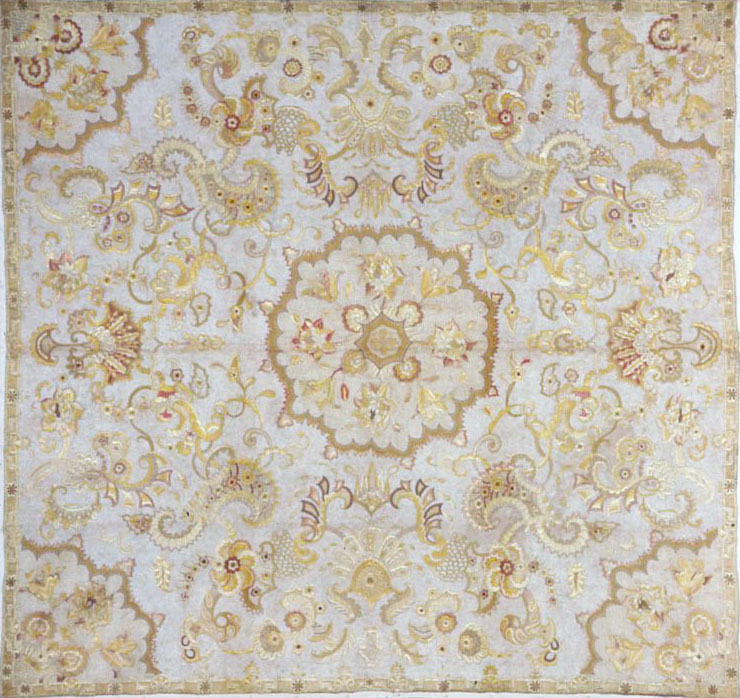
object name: Textile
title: Bedcover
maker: England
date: c.1720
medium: Cotton, plain weave; embroidered with silk floss and silk yarns in back, cross, herringbone, individual satin, satin, star, and stem stitches; laid work, couching, and French knots;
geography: England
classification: textile; needlework (visual works); needlework - quilt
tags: flowers, foliage